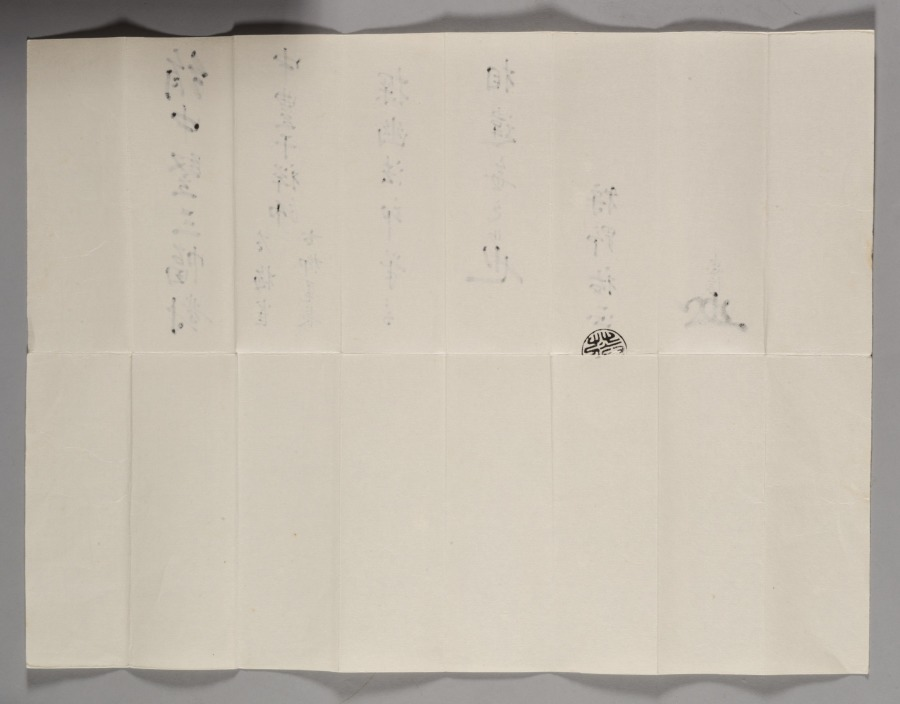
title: Sparrows on Blossoming Plum; A Sage with Tiger; Chinese Bird on Snow-Laden Branch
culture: Japan, Edo period (1615–1868)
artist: Kano Tan’yū (Japanese, 1602–1674)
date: 1661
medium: Triptych of hanging scrolls; ink and slight color on silk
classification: Painting